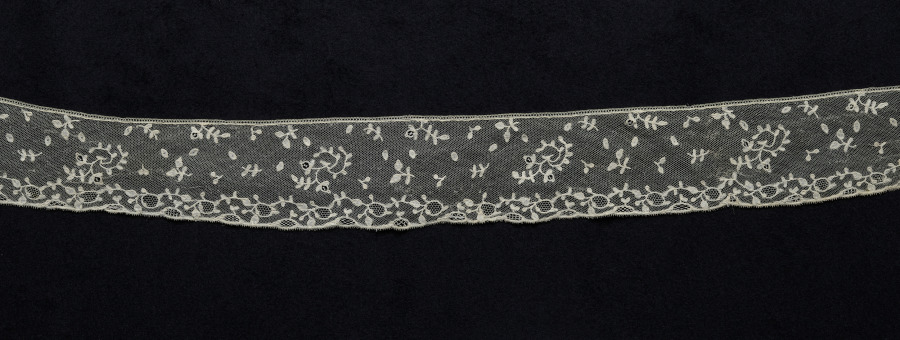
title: Lace Edging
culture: Belgium; Brussels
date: 1780–99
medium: Bobbin lace (appliqué)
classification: Lace